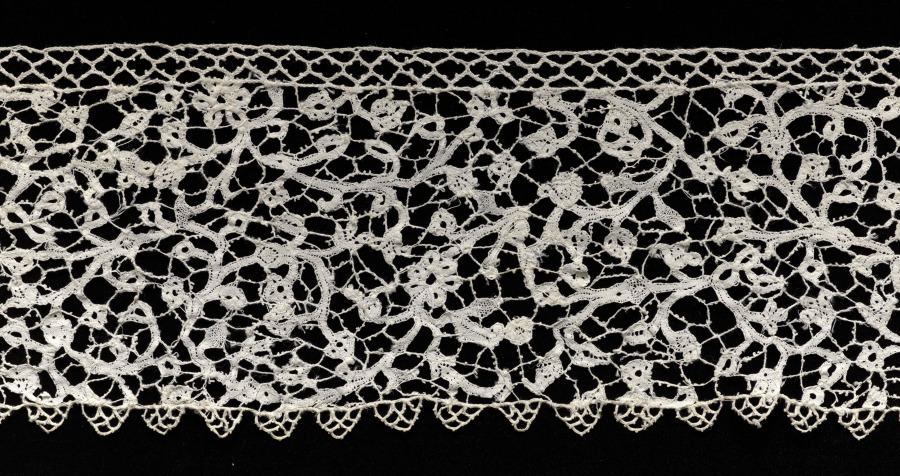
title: Lace Border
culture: Italy, Milan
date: 1600s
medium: Linen: bobbin lace (bride ground)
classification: Lace